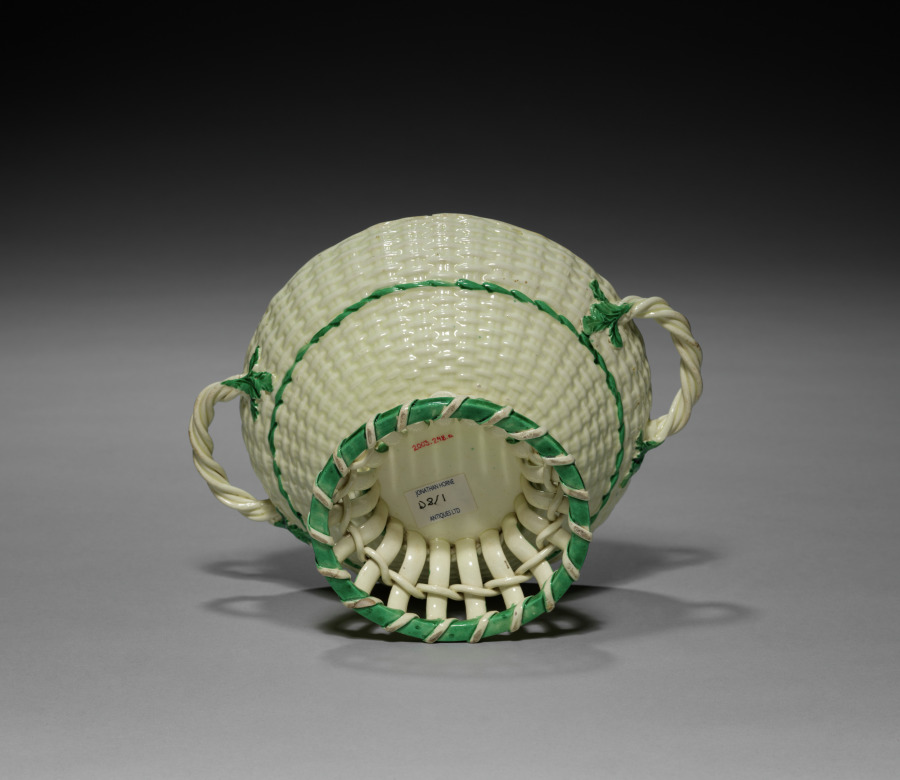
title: Wicker-Work Sauce Tureen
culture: England, 18th-19th century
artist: Wedgwood Factory (British)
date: c. 1780–1840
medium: earthenware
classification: Ceramic